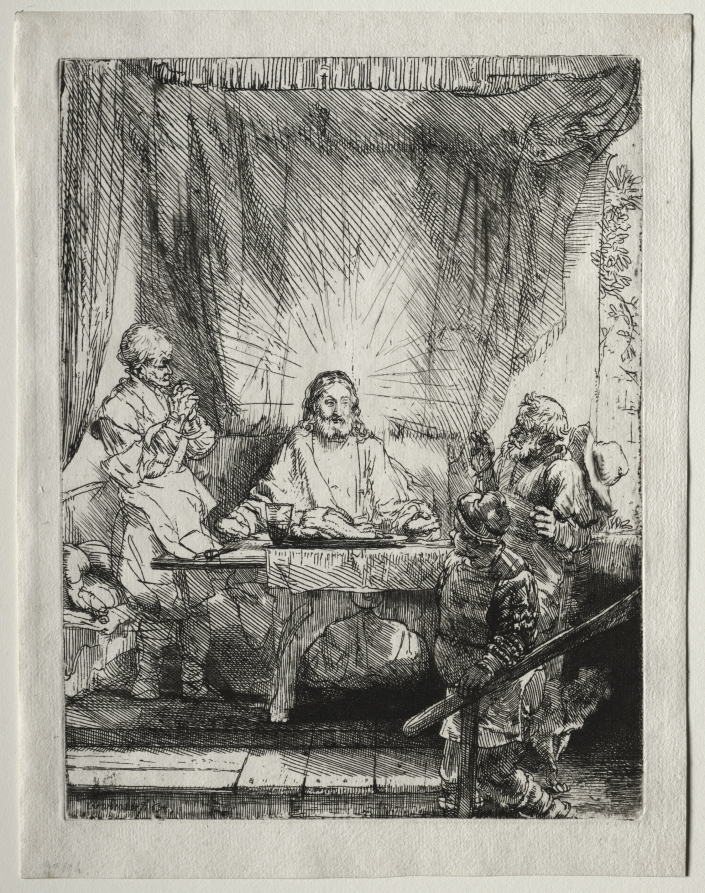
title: Christ at Emmaus: The Larger Plate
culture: Netherlands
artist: Rembrandt van Rijn (Dutch, 1606–1669)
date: 1654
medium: etching, engraving and drypoint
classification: Print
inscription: lower left, in plate: Rembrandt f. 1654 ; lower left, in graphite: N° 194. ; lower right, in graphite: 87 ; VERSO, lower left, in graphite: 357[underlined and sideways] ; lower left, in graphite: A99911 ; lower left, in graphite: 87 ; lower left, in graphite: 01260 ; lower center, in graphite: B. 87 ; lower right, in graphite: R.L.